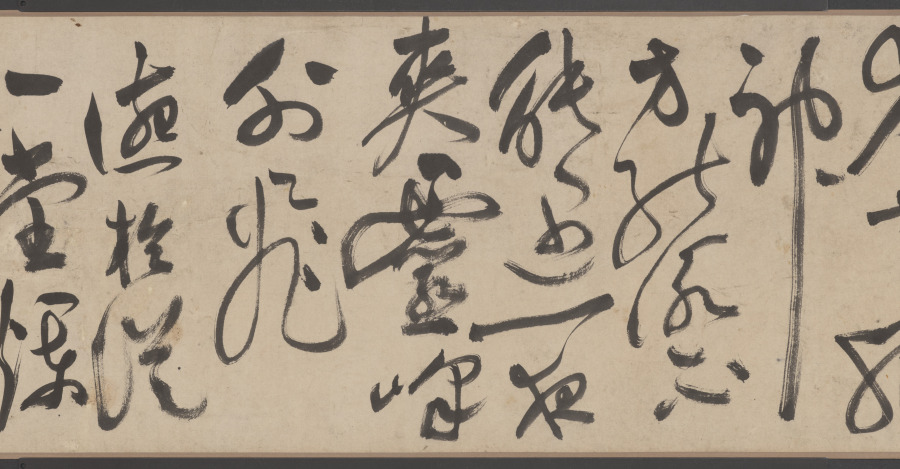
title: Retreat on an Autumn Day, in Cursive Script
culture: China, Ming dynasty (1368–1644)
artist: Zhu Yunming (Chinese, 1460–1527)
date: dated 1523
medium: Handscroll; ink on paper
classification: Calligraphy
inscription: 款識：讌於從一堂，爛漫醉書。癸未（1523）七月晦日也。枝山允明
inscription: 《閒居秋日》逃暑應能蹔閉關，未消多把古賢攀。並拋杯酌方為懶，少事篇章恐礙閑。風墮一庭鄰寺葉，雲開半面隔城山。浮生只說潛居易，隱比求（脫「名」）事更艱。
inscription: 《句曲道中》老至誰憐晝錦明，春來聊得客襟清。宵依星斗宮壇臥，曉（脫「入」）神仙宅舍行。眼看山多城郭少，肩挑詩重簿書輕。何時總入煙霞去。不見人間寵辱驚。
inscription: 《登茆峰》下馬門前一振衣，翠微高迥逼清微。雲端洞裡仙人過，月下山中長史歸。金焰暈牀砂氣伏，紫雲穿竇朮芽肥。神方能詠不能遇，一夜爽靈峰外飛。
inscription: 鈐印：「晞哲」、「允明」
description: This masterwork of calligraphy by Zhu Yunming from Suzhou combines two poems by the artist in cursive script style, characterized by its uninhibited, swift, and intuitive brushwork, so powerful that it here dissolved characters into dots or lines. Written from right to left and top to bottom and alternating in light dry to deep saturated ink, single characters may take a whole column or extend into the next one. Following the movement of the brush, they seem to dance over the paper.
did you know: Zhu Yunming stated that he was in an inebriated state when he created this work.